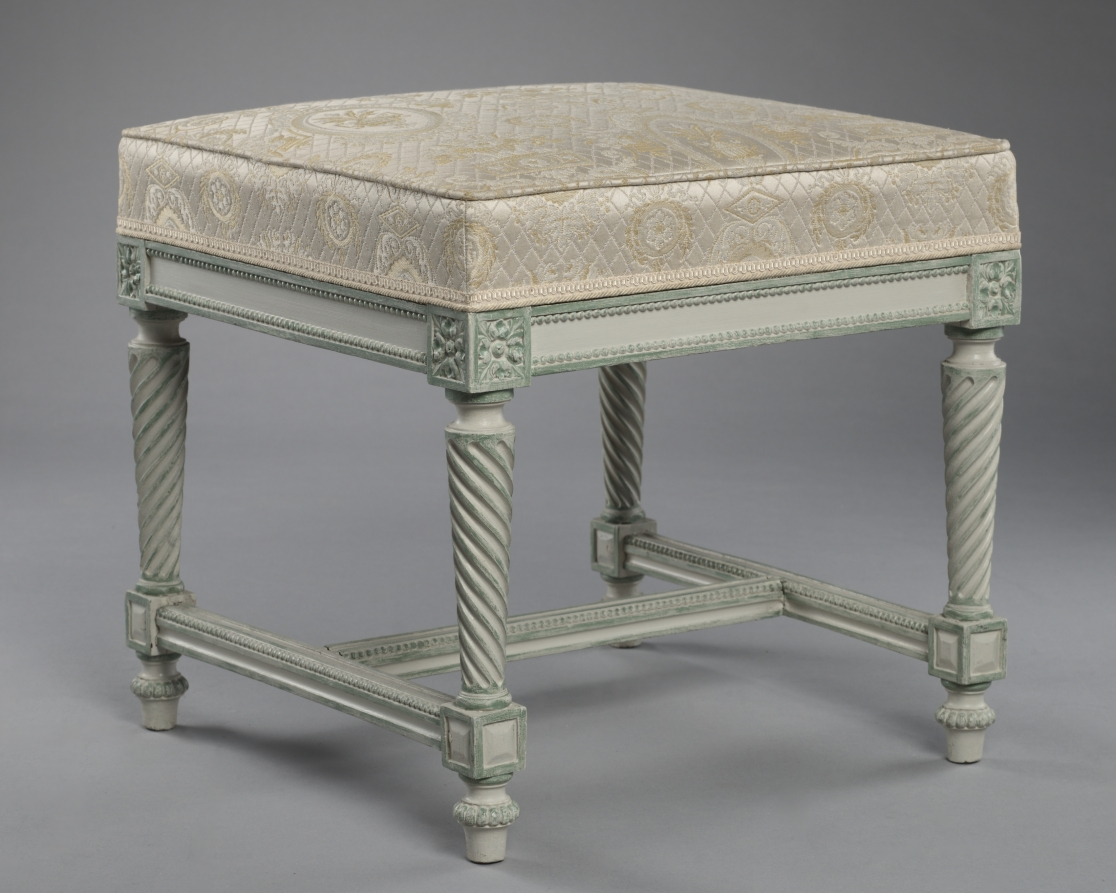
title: Stool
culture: France, Paris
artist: François-Honoré-Georges Jacob (French, 1770–1841)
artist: Georges Jacob (French, 1739–1814)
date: 1805–1813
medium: painted walnut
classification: Furniture and woodwork